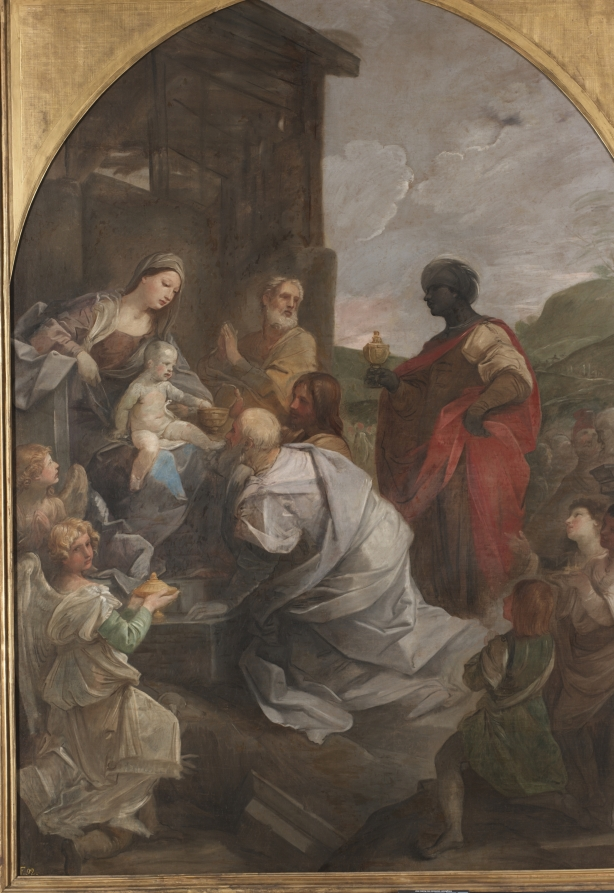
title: Adoration of the Magi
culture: Italy, 17th century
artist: Guido Reni (Italian, 1575–1642)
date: 1642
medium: oil on canvas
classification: Painting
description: This large altarpiece was in the artist's studio when he died, and parts of the composition appear incomplete. Some figures lack color, and Reni never finished the wooden structure. The silvery ground layer appears everywhere, as do his changes to the composition, such as the dog's head above the angel's right knee and the adjustment to Christ's right leg, covered in blue. However, Reni's death does not fully explain the unfinished quality. Toward the end of his career, he increasingly painted in a loose and sketchy manner—popular with collectors at the time—an approach implying that concrete forms could never depict the ideal, spiritual world Reni aimed to present.